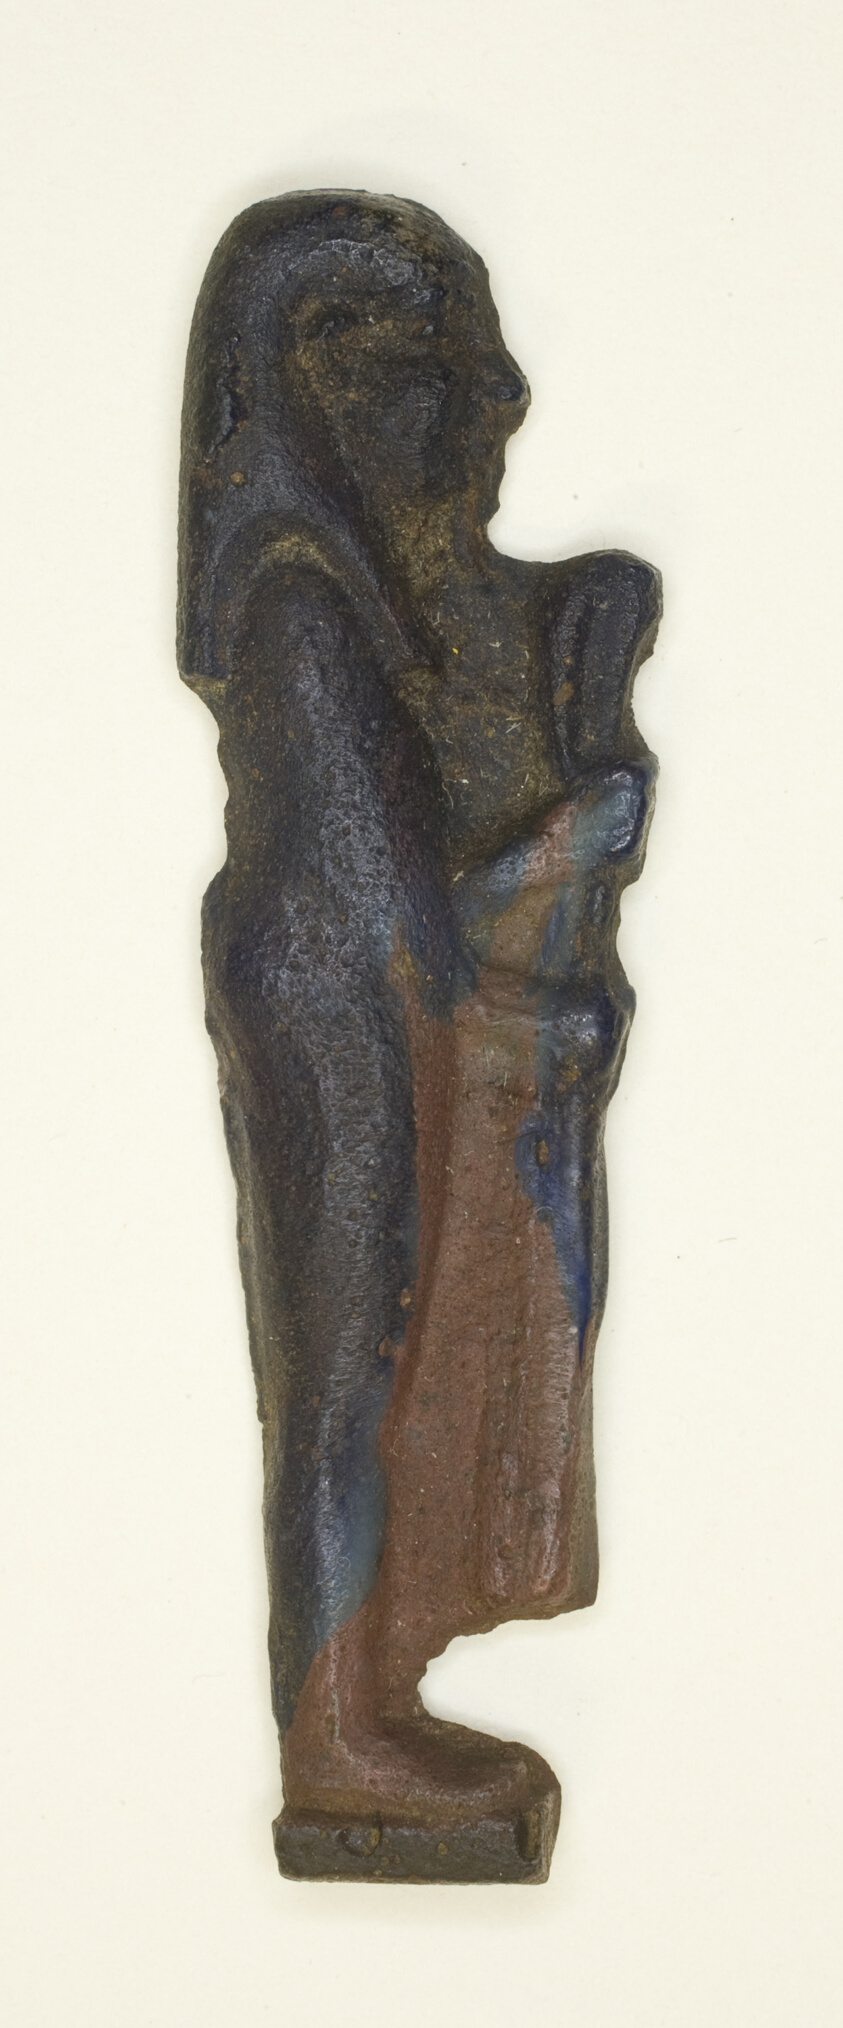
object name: Costume and Accessories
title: Amulet of the God Imsety (one of the four Sons of Horus)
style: late period (egyptian), egyptian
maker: Egyptian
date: Late Period, Dynasty 25–30 (780–343 BCE)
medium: Glass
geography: Egypt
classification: amulet; jewelry; glass; ancient art; costume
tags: gods (deities), mummies